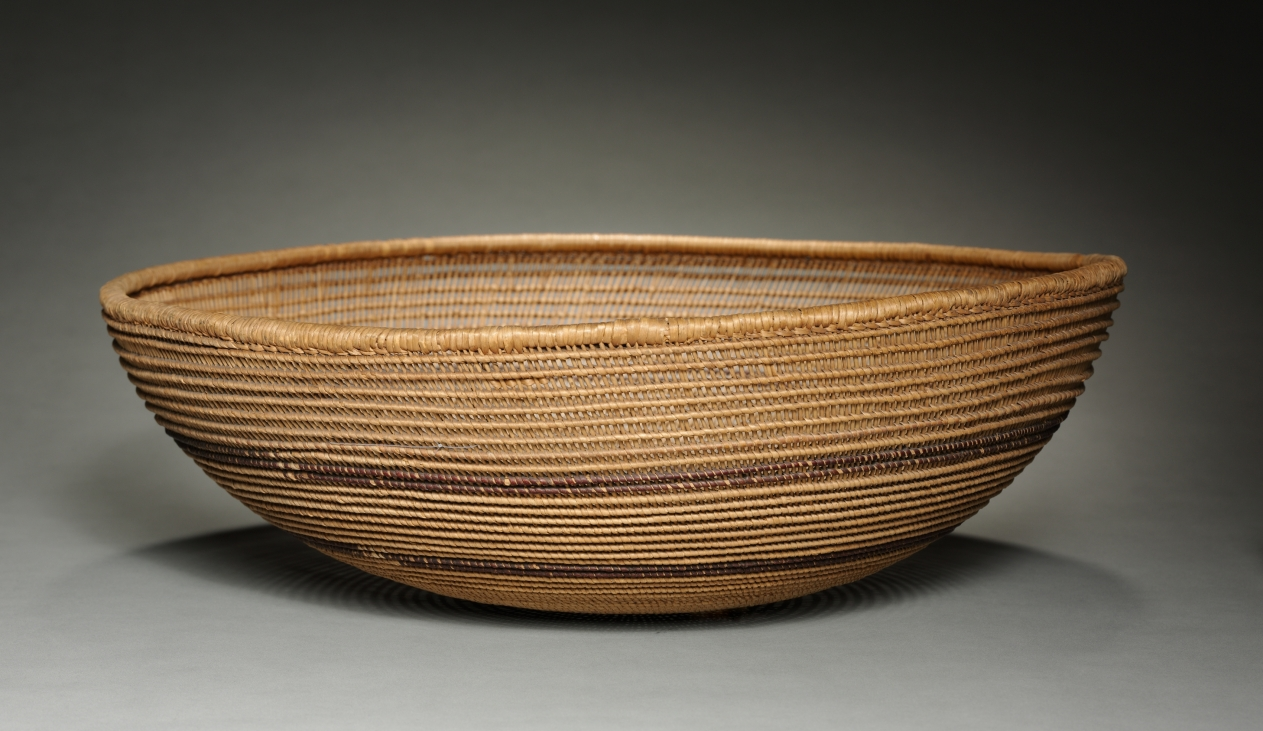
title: Tray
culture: California, Pomo, late 19th- early 20th century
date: 1895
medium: plain twine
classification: Basketry